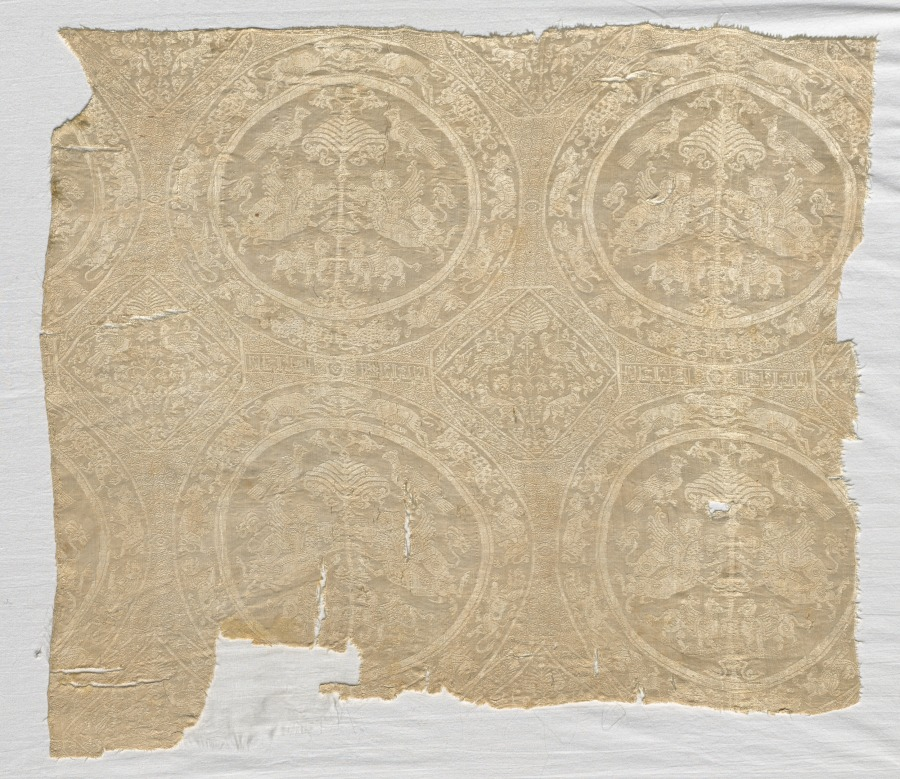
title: Fragment with confronted animal medallions and kufic bands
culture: Iran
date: 1480–1649 (radiocarbon date, 95% probability)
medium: Silk: diasper, tabby weave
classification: Textile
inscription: Wa-kull ma badharahu al-Raman la-mu'awwal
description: The fragment preserves a wide central band flanked by narrower inscription bands. The narrower bands contain, on a dark blue background, a continuous inscription in elaborate Kufic, the ivory-colored lettering oriented at right angles to the warp. On the wider ivory panel there appear ovals enclosing a frieze of running animals within which are hexagons enclosing stars. The ovals alternate vertically with cartouches containing an inscription in simple Kufic, the design appearing in blue, pink, and ivory.